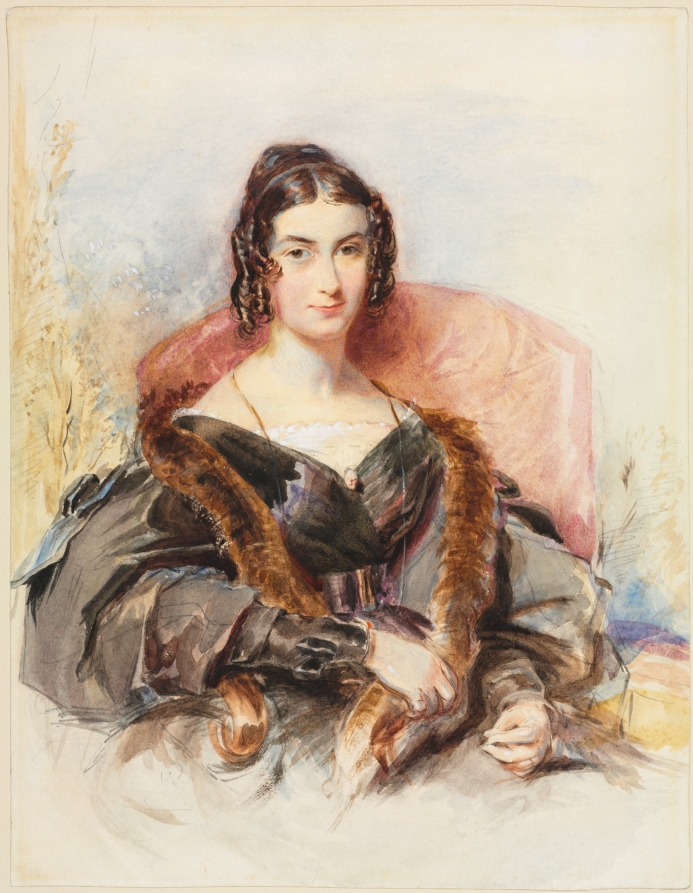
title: Portrait of a Woman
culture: England, 19th century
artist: George Richmond (British, 1809–1896)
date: c. 1830–1835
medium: watercolor with graphite heightened with white paint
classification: Drawing